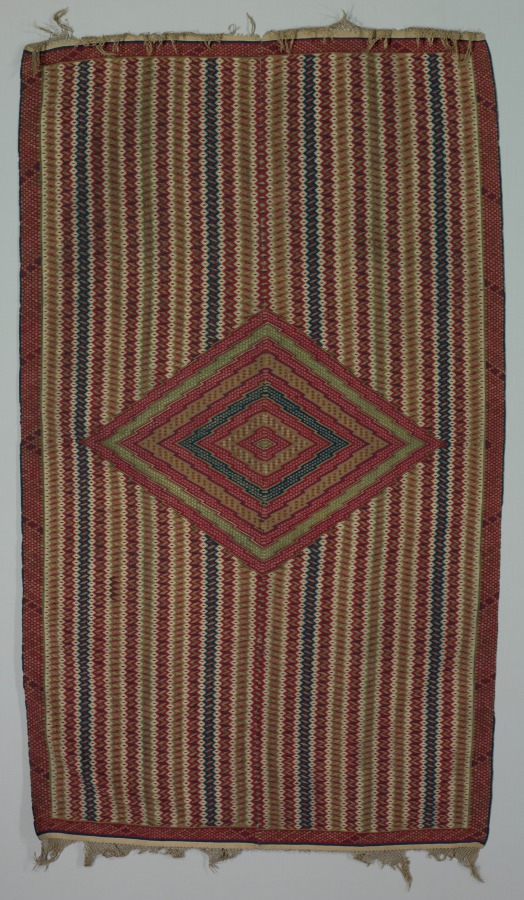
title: Sarape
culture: America, Native North American, Southwest, Mexico, Saltillo, Post-Contact, Classic Period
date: c. 1820–1860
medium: tapestry weave: cotton and wool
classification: Textile